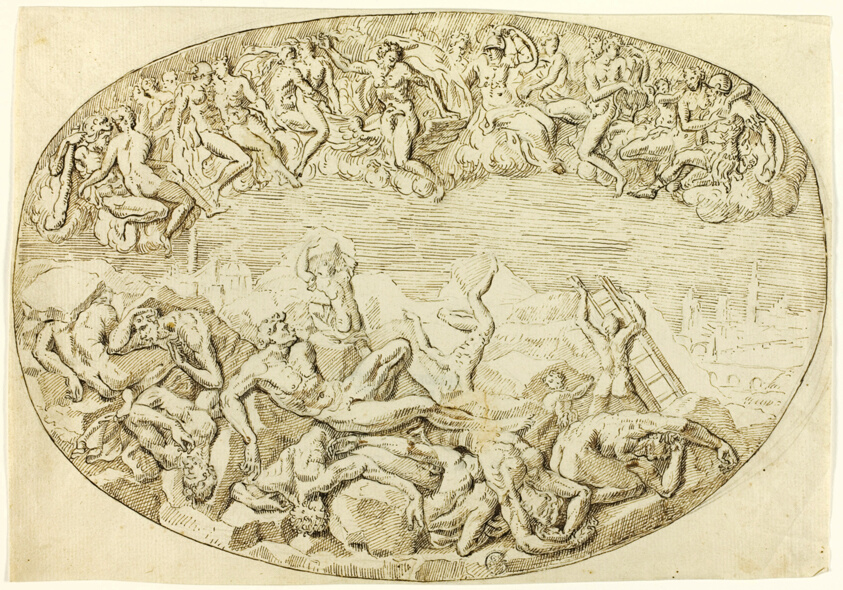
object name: Drawing and Watercolor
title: Fall of the Giants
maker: After Guglielmo della Porta; Italian, 1500/10-1577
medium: Pen and brown ink, over traces of black chalk, on cream laid paper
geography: Italy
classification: pen and ink drawings; drawings (visual works); prints and drawing